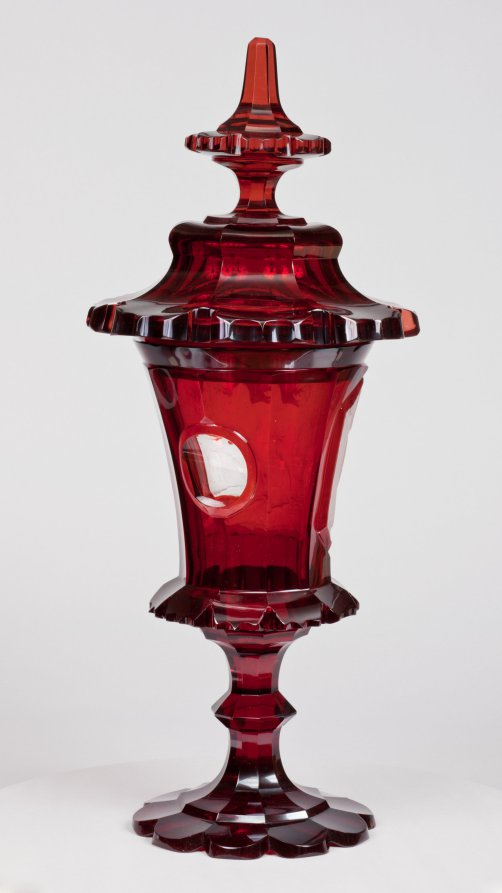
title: Covered Cup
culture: Bohemia, 19th century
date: mid-1800s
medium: ruby glass with engraved decoration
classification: Glass